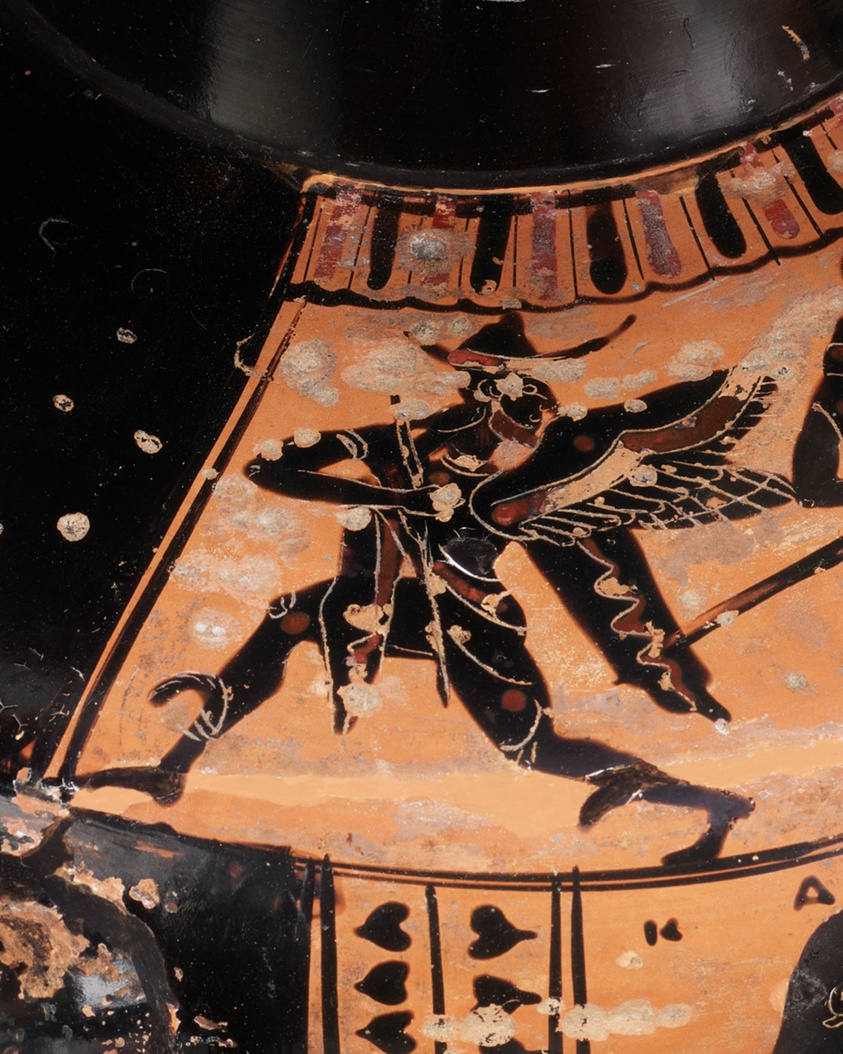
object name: Vessel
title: Hydria (Water Jar)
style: archaic (greek), attic, black-figure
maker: Attributed to a painter of the Leagros group; Greek; Athens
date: about 515-500 BCE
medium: terracotta, black-figure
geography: Athens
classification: vessel; earthenware; ceramics; ancient art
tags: mythological figures, drinking, Heracles, Aphrodite